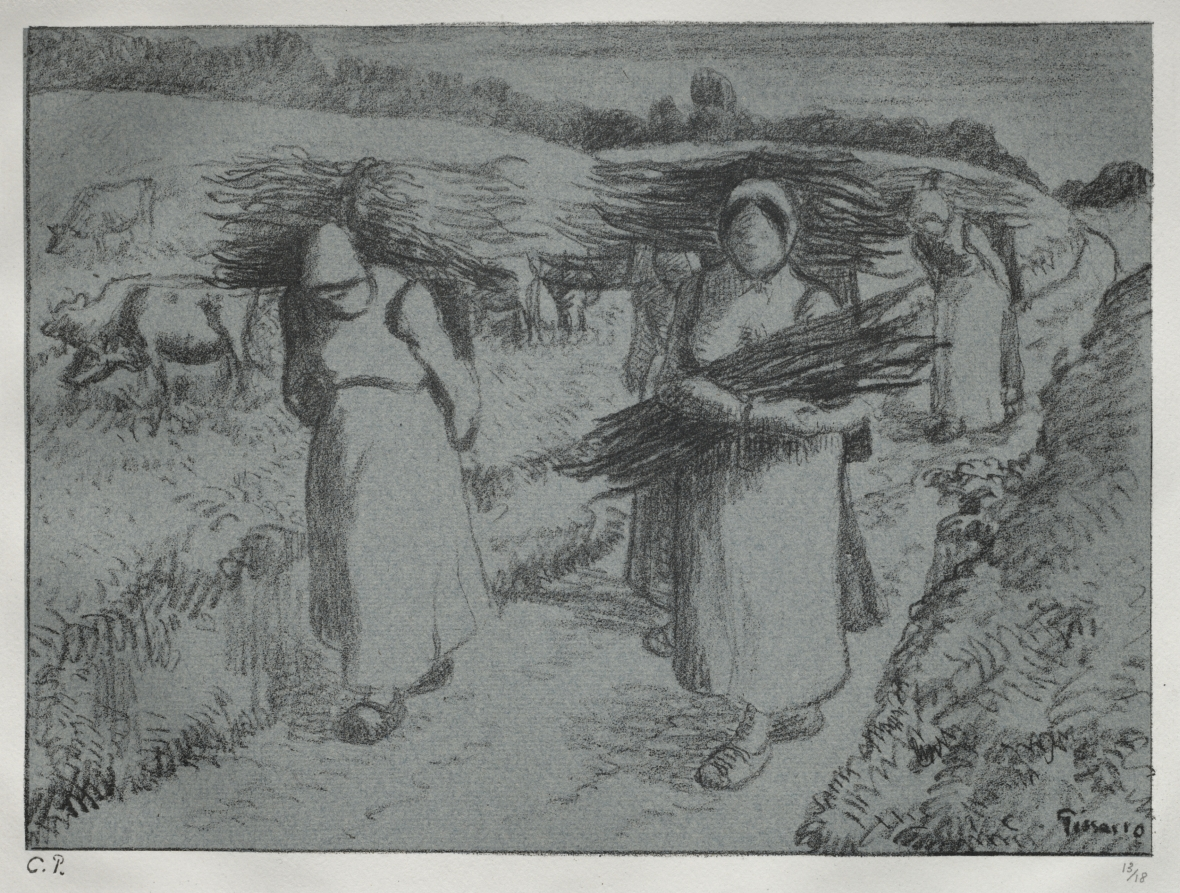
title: Peasants Carrying Fagots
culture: France, 19th century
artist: Camille Pissarro (French, 1830–1903)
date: c. 1896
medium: Transfer lithograph on blue chine collé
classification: Print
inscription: Signed, lower right, in stone: C. Pissarro; stamped, lower left margin, in gray: C.P. [Lugt 613e]; inscribed, lower right margin, in graphite: 13/18